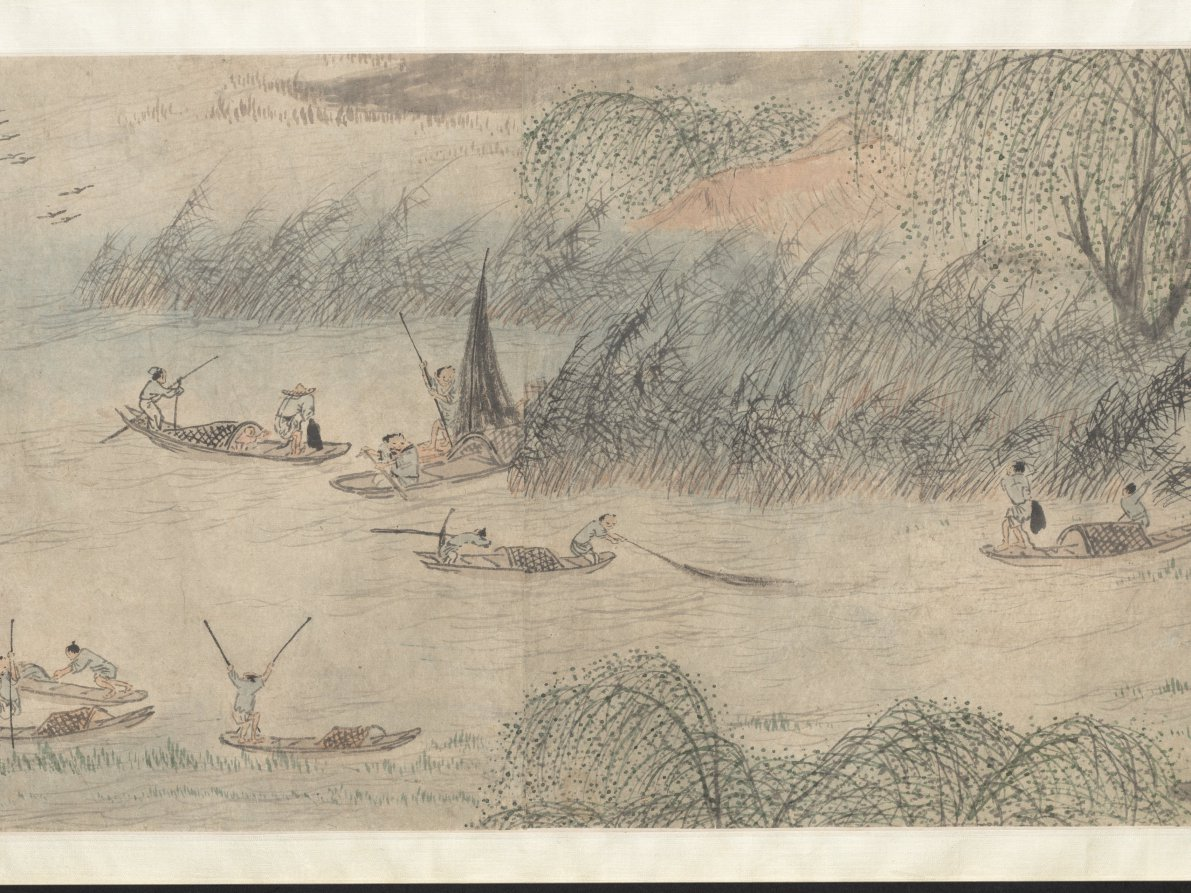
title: Fisherman's Joy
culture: China, Ming dynasty (1368–1644)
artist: Qian Gu (Chinese, 1508–c. 1578)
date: 1572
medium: Handscroll; ink and light color on paper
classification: Painting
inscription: Artist's inscription, signature, and seal: On the autumn day of the jen-shen year [1572], P'eng-ch'eng, Ch'ien Ku painted [this]. [seal] Hsüan-ch'ing shih. 2 colophons, both dated 1689, and 5 additional seals of Yün Shou-p'ing (1633-1690).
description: This painting has a scene showing two small crafts, each manned by two fishermen, practicing a traditional fishing method. In one of them, a man uses a bamboo pole to direct the movements of a cormorant bird sent into the water. Cormorant fishing, witnessed in some areas of the lower Yangzi River, appears in Zhe school paintings. Qian Gu may have borrowed these narrative figure scenes from Zhe school paintings, while his vantage point, brushwork, and soft tones align with the Wu school style. Scenes of fishermen appealed to urban and educated audiences who idealized the self-sufficient independence of fisherfolk.